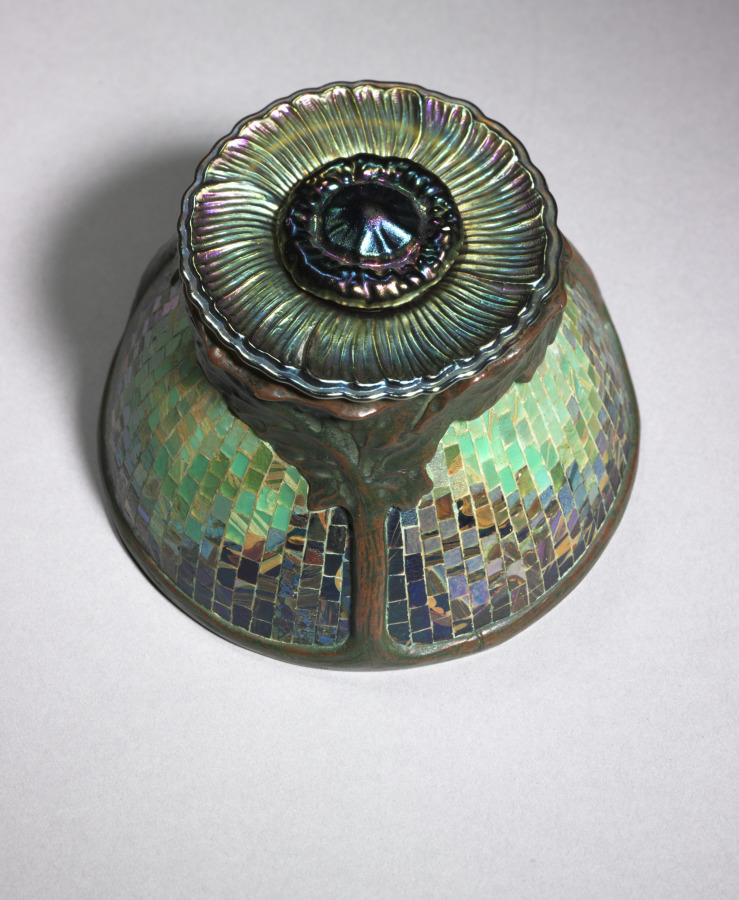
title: Poppy Inkwell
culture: America, New York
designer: attributed to Clara Wolcott Driscoll (American, 1861–1944)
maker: Tiffany Glass & Decorating Company (America, New York, 1892–1902)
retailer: Tiffany Studios (United States, New York, 1902–32)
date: c. 1898–1906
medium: favrile glass mosaic, bronze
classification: Glass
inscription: stamped on underside: 28289/Tiffany Studios/New York/TGDCo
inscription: engraved on underside of insert: L.C.T. Favrile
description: By 1900 Louis Comfort Tiffany had expanded his empire by increasing the firm’s production of “fancy goods,” including inkstands, candlesticks, clocks, small boxes, desk sets, tea screens, and other functional objects. Along with the array of artistic glass designs from his factory in Corona, Queens, works in ceramic, bronze, other metals, and even jewelry abounded. These smaller, more affordable luxury items were designed with as much thought to artistry as the great stained glass windows and lamps through which the firm enjoyed unrivaled success.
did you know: More than a thousand tiny pieces of glass form the mosaic design of this inkwell.